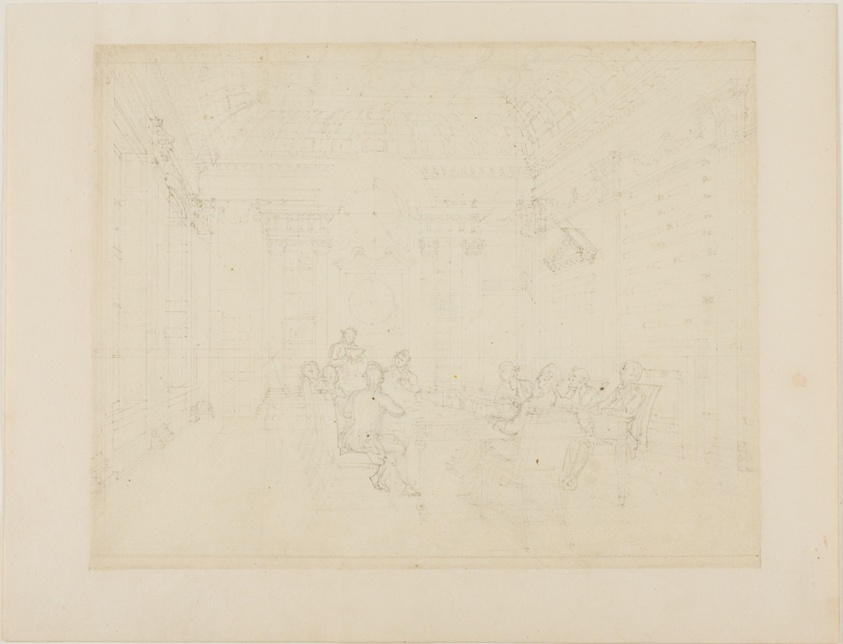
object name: Drawing and Watercolor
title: Study for Board Room of the Admiralty, from Microcosm of London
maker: Augustus Charles Pugin (English, born France, 1762-1832); Thomas Rowlandson (English, 1756-1827)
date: c. 1808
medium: Graphite on cream wove paper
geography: England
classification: graphite; drawings (visual works); prints and drawing